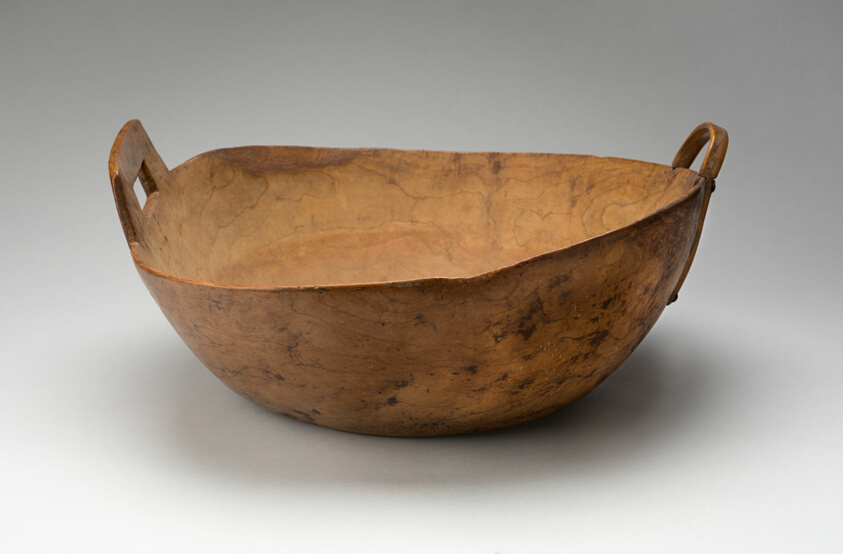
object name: Decorative Arts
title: Scoop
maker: Artist unknown (American, 17th century); Possibly Connecticut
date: 1690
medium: Walnut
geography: Connecticut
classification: wood; american decorative arts; american arts; decorative arts